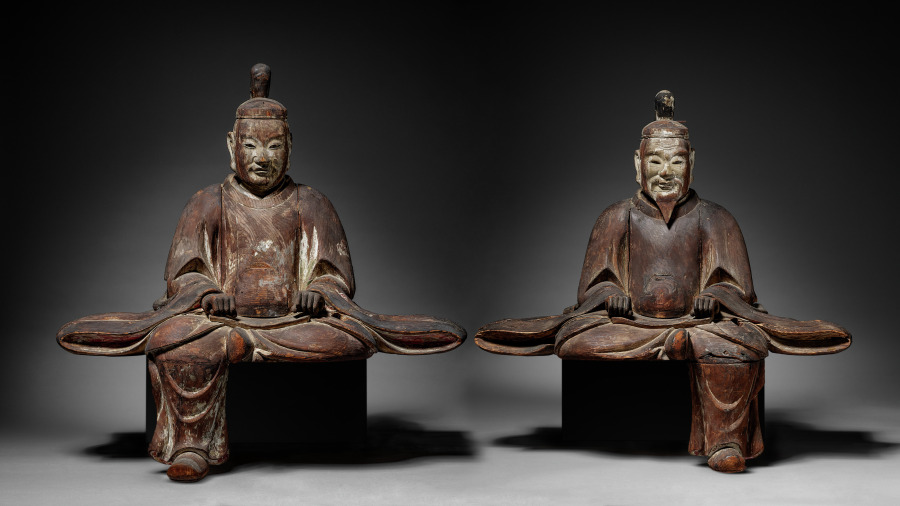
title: Pair of Guardian Figures (Zuishin)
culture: Japan, Muromachi period (1392–1573) to Edo period (1615–1858)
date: c. 1560–1625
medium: Japanese cypress (hinoki) with traces of color; crystal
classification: Sculpture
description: Sculptors carved these two figures to look like members of the guard who protected the Japanese aristocracy in the 10th to 12th centuries. The pair belong in the roofed gate of a Shinto shrine. Their role was to embody the divine protectors of the deities, or kami, residing at the shrine. Their inset crystal eyes make them appear vigilant.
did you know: Some Japanese sculptors used to specialize in inset crystal eyes like the ones these sculptures have.